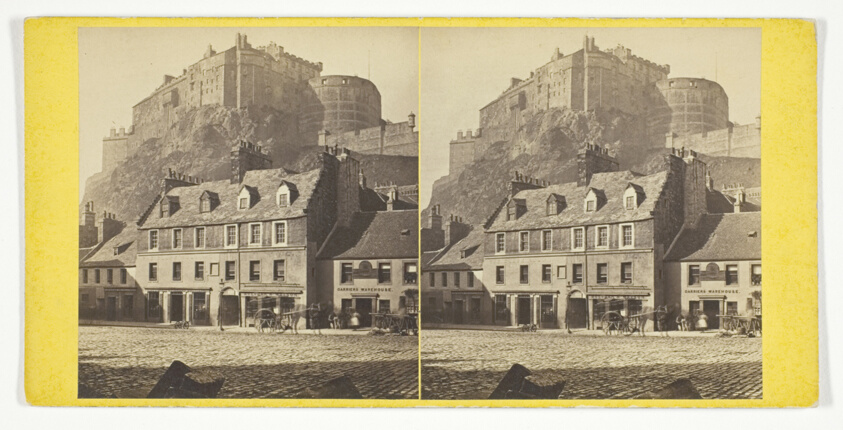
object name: Photograph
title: Edinburgh Castle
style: 19th century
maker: Archibald Burns (Scottish, died 1880)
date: 1867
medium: Albumen print, stereo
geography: Edinburgh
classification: photography; photograph; albumen silver print; stereograph (albumen)